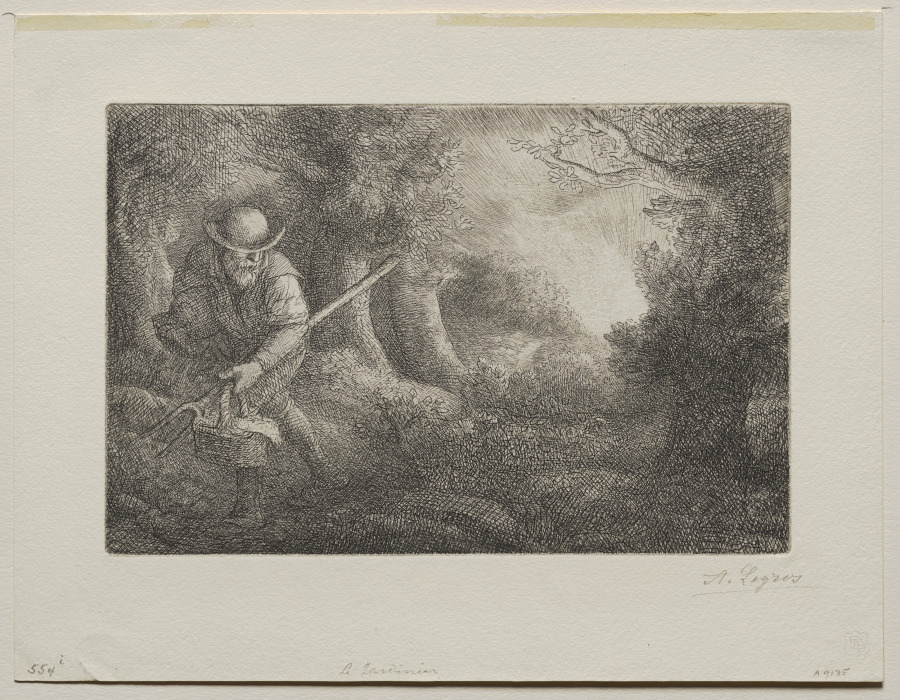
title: The Gardener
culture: France, 19th-20th century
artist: Alphonse Legros (French, 1837–1911)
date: c. 1857–1911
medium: etching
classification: Print